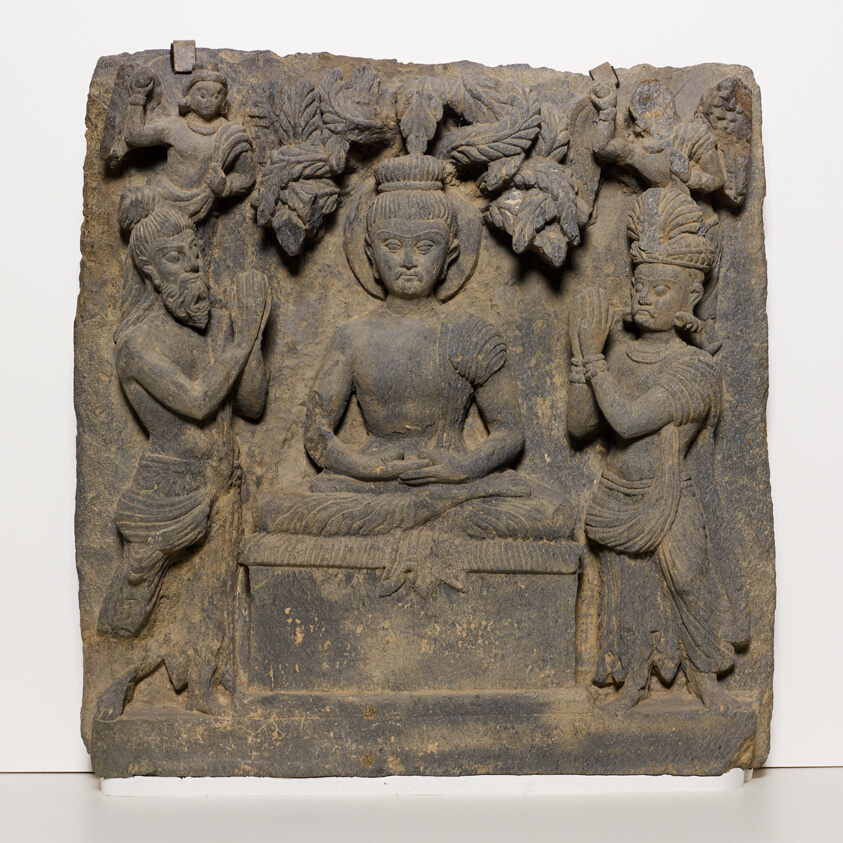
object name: Sculpture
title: Buddha Worshipped by the Gods Indra and Brahma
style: South Asian, gandharan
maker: Pakistan; Ancient region of Gandhara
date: Kushan period, 1st/2nd century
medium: Schist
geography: Gandhara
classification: sculpture; stone (unidentified); stone; asian art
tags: Buddha